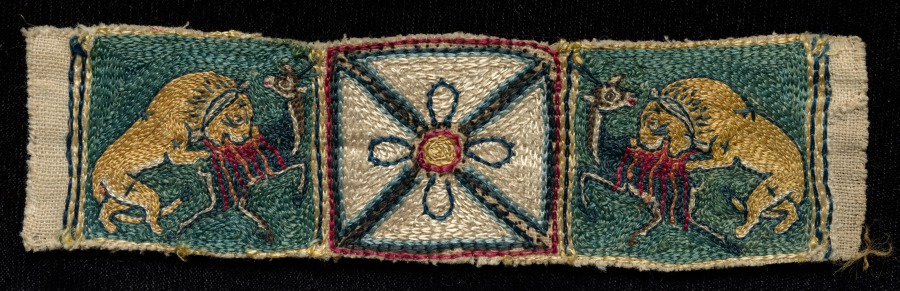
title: Fragment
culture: India, Jaipur, 18th-19th century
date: 1700s - 1800s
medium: embroidery: silk on cotton tabby ground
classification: Embroidery